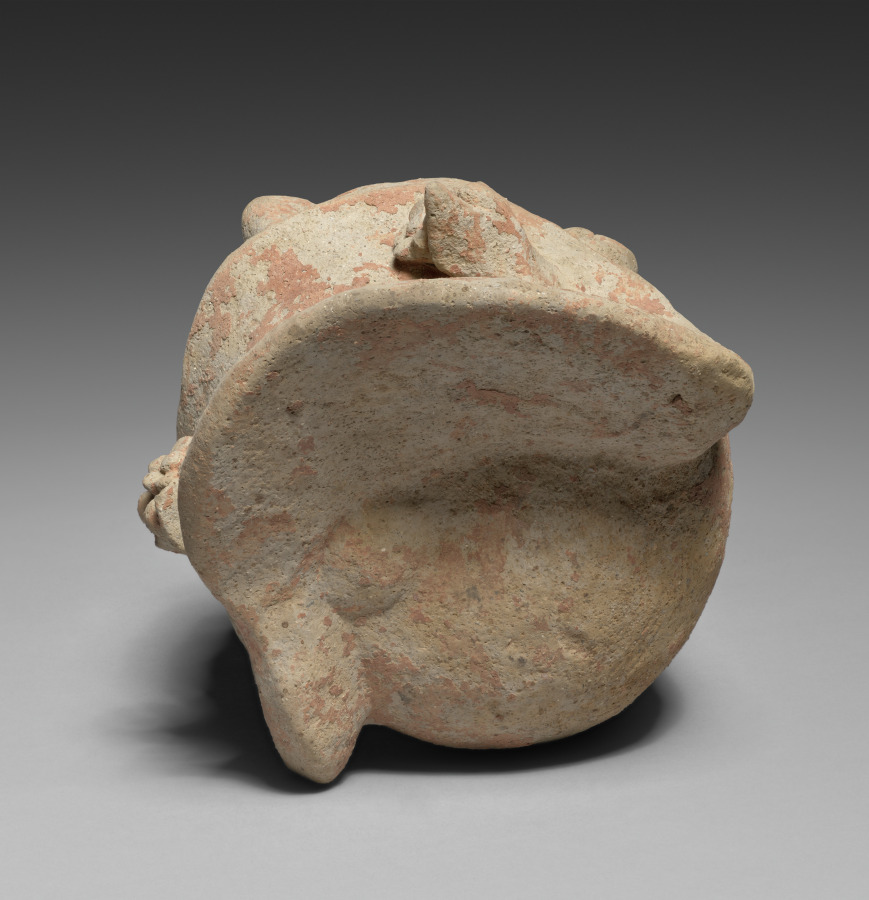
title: Female Figure of a Court Entertainer Dancing (Head)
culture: China, Sichuan province, Eastern Han dynasty (25–220 CE)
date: 100s CE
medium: Pottery with traces of color pigment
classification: Ceramic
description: During the Han era, tombs of the elite were provided with sculpted renditions of their earthly entourage, such as guardians or musicians, to signify their status in the afterlife. The female dancer with elaborate hairdo held by flower ornaments raises one arm holding her wide sleeve with one hand, while the other lifts her robe to reveal what appears to be a drum underneath her garment, her face smiling, all in a gesture of an entertainer.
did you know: The dancer lifts her robe to reveal what appears to be a drum underneath her garment.